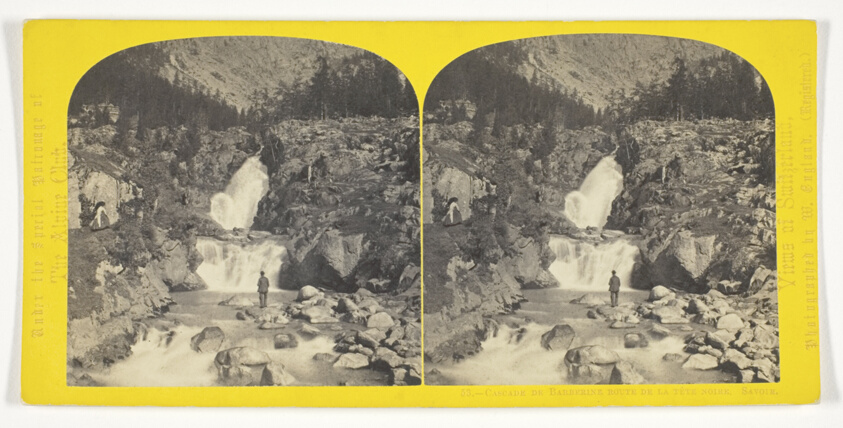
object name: Photograph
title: Cascade de Barberine de la Tete Noire. Savoie, from the series "Views of Switzerland"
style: 19th century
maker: William England (English, 1816-1896)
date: 1850/65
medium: Albumen print, stereo, No. 53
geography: Switzerland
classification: photography; photograph; albumen silver print; stereograph (albumen)